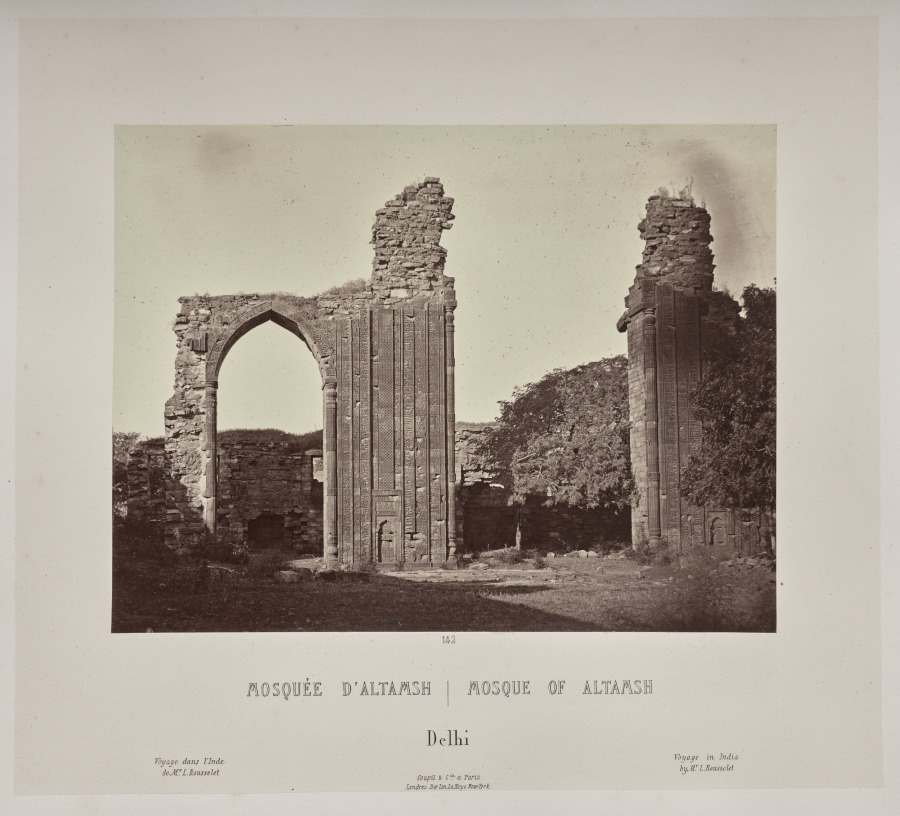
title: Mosque of Altamsh, Delhi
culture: France, 19th century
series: India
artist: Louis-Théophile Marie Rousselet (French, 1845–1929)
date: 1865–68, published 1869–70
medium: Albumen print from glass plate negative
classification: Photograph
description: Concerned that his drawings did not do justice to the splendor of India’s monuments, Rousselet learned photography in India that year, a remarkable accomplishment. He proved to be a talented photographer with a sophisticated sense of composition. The scenes in this volume sweep across sites of Sultanate, Rajput, and Mughal power in northern India, from the sacred Hindu city of Varanasi on the Ganges River to Alwar in Rajasthan. Also included are several scenes of industry and portraits of Indian rulers.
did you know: Louis Rousselet described himself as a “scientific traveler” when he went to India alone at age 18 in 1863 and stayed into 1868.